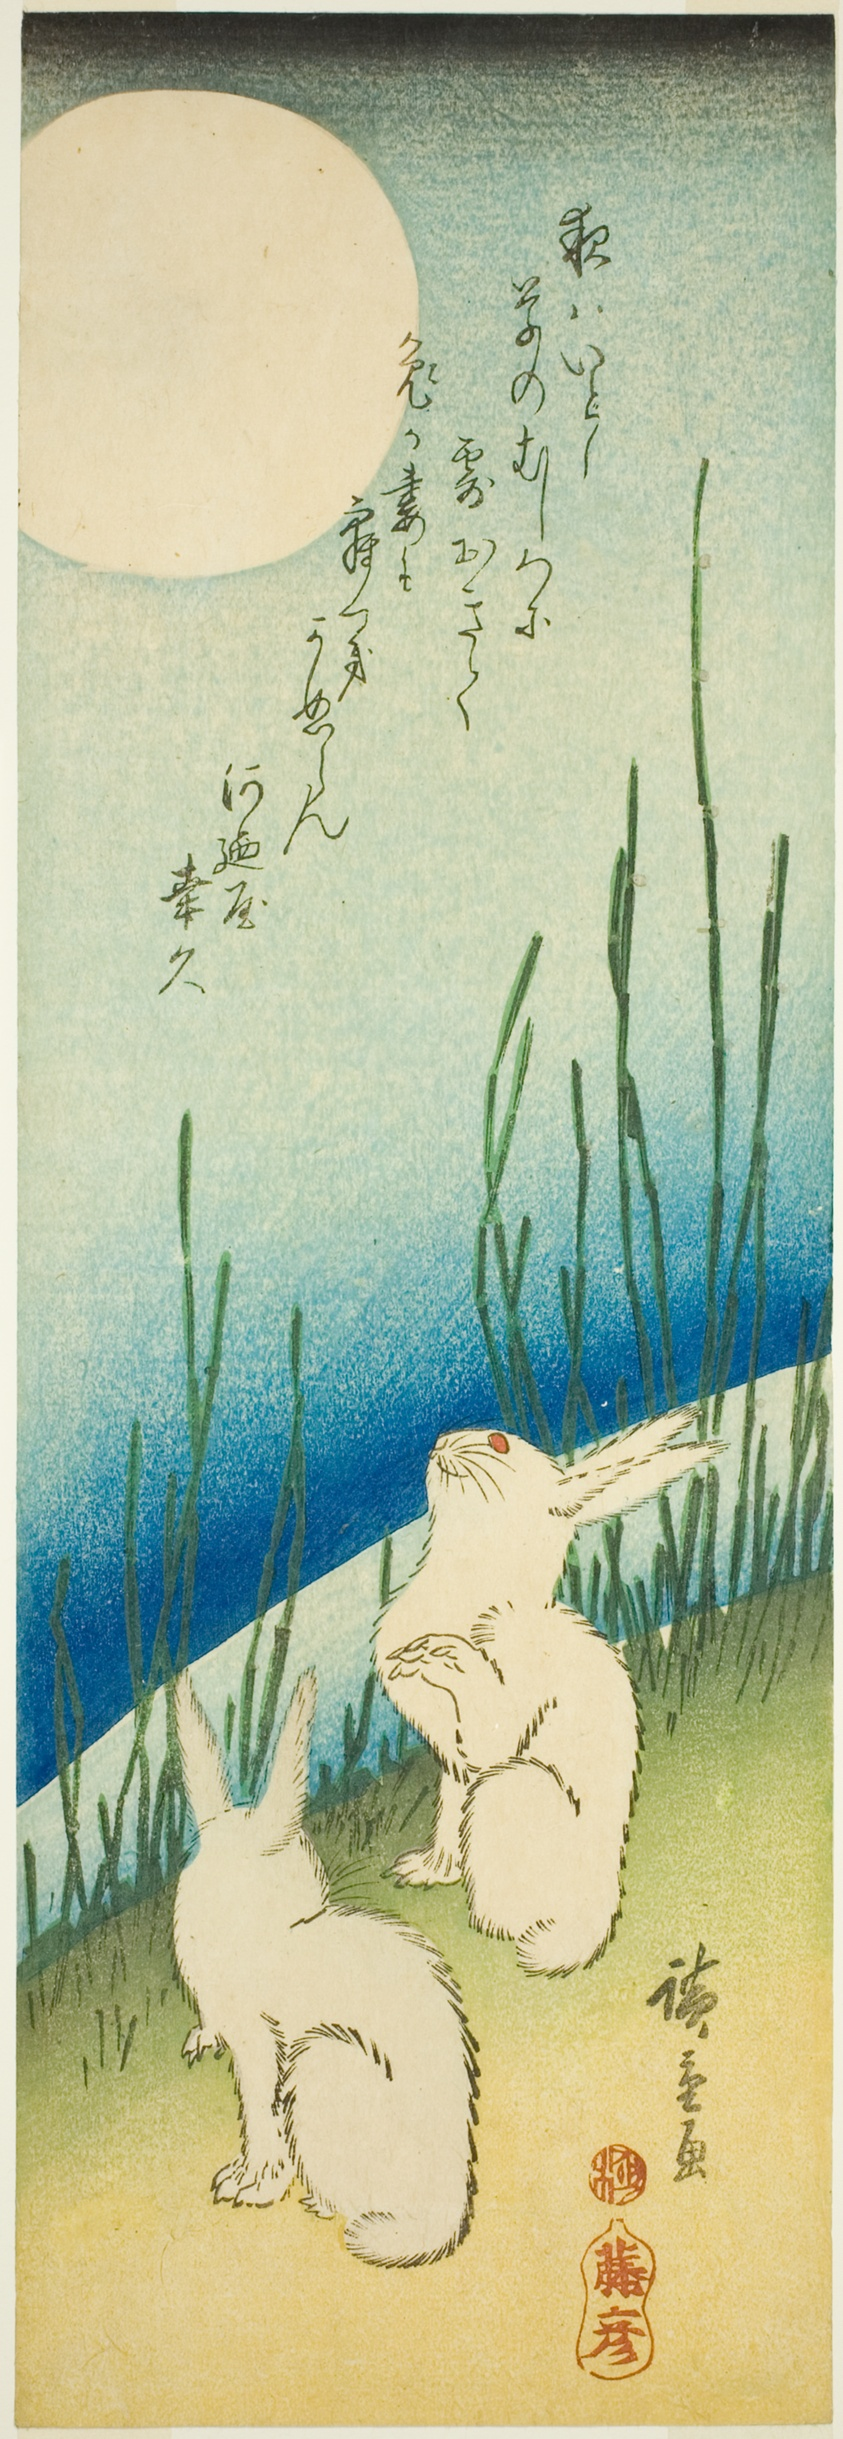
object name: Print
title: Rabbits under full moon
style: Japanese (culture or style)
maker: Utagawa Hiroshige 歌川 広重; Japanese, 1797-1858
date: c. 1830s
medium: Color woodblock print; chutanzaku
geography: Japan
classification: print; asian art